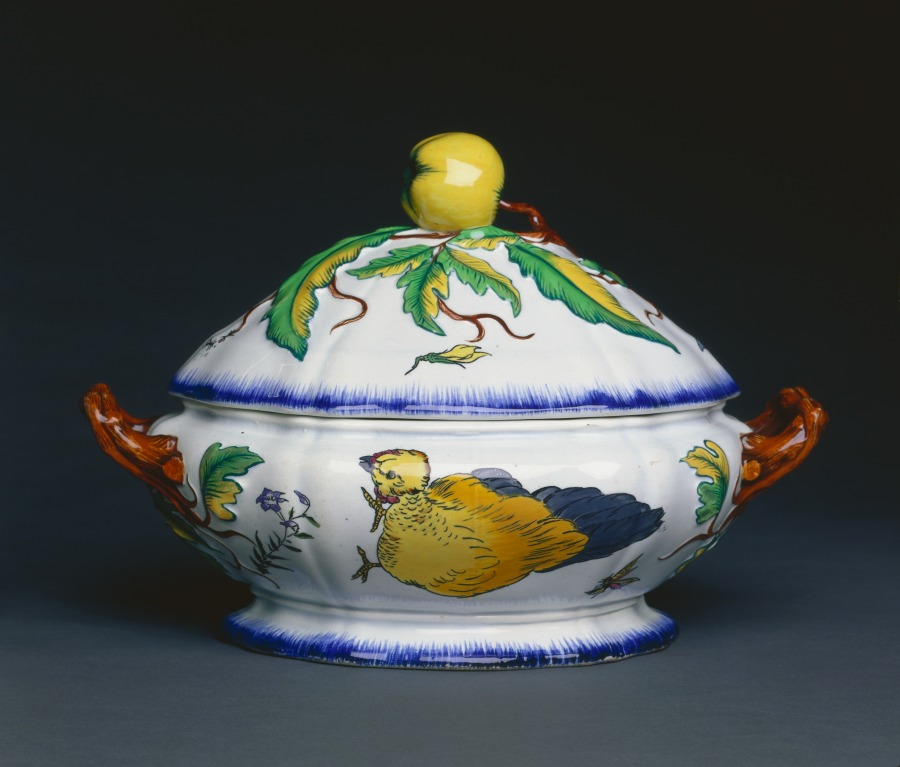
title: Covered Tureen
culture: France, Creil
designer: Félix Bracquemond (French, 1833–1914)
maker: Creil Factory (French)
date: 1866–75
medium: porcelain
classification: Ceramic